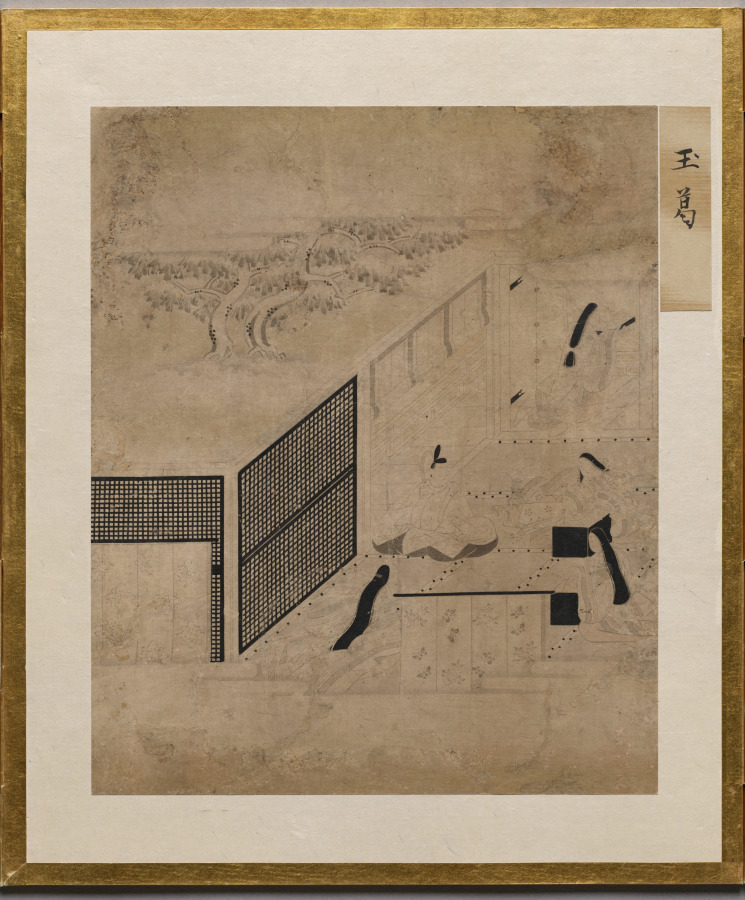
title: Jeweled Chaplet from Album of Illustrations for the Tale of Genji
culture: Japan, Edo period (1615–1868)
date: 1600s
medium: painting in an accordion-style album; ink, light color, and gold on paper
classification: Bound Volume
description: This album contains illustrations for the classic literary work the Tale of Genji, authored in the 1000s by Murasaki Shikibu, an aristocrat of the Heian period (794–1185) court. The scenes are painted in the “white drawing” (hakubyō) mode, in which a fine ink line is used to depict figures and spaces with great subtlety, punctuated only occasionally by traces of red pigment for a character’s lips, a detail of a garment, or a decorative element. These two scenes illustrate episodes from the chapters “Thin Veil of Cloud” (Usugumo) and “Barrier Gate” (Sekiya).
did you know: The illustrations are identified by chapter title in cartouches to the upper right of the paintings.